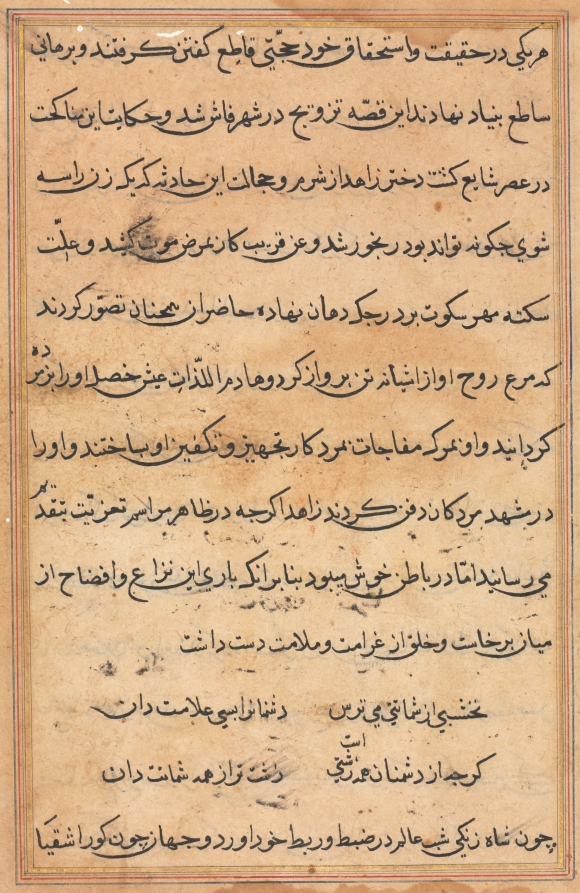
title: Page from Tales of a Parrot (Tuti-nama): text page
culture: Mughal India, court of Akbar (reigned 1556–1605)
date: c. 1560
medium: gum tempera, ink, and gold on paper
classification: Painting